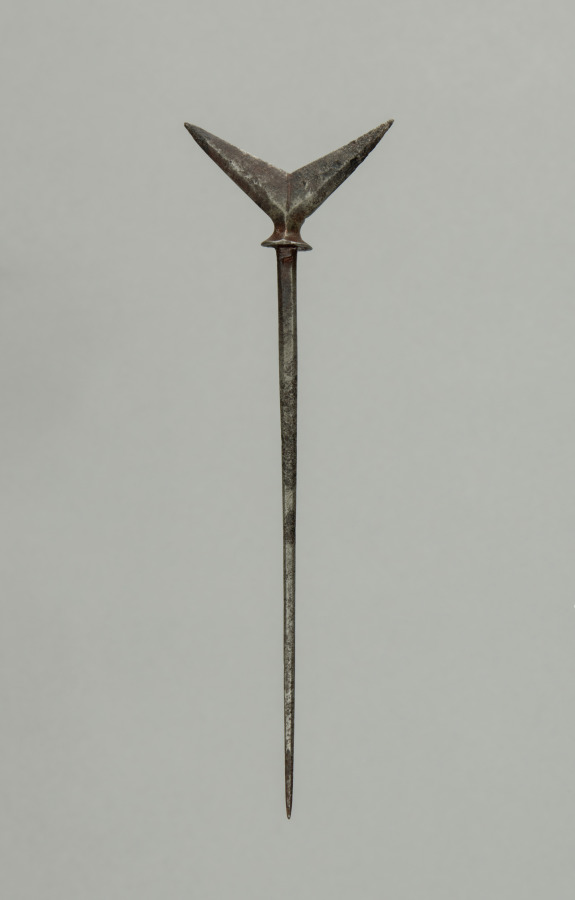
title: Arrow Point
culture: Japan, Edo period (1615–1868)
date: 1700s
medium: steel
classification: Arms and Armor